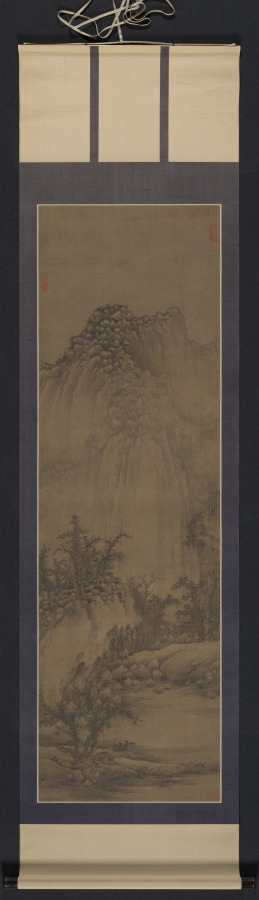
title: Buddhist Retreat by Stream and Mountains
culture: China, Northern Song dynasty (960-1127)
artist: Juran (Chinese, active 960–985)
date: 960–85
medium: Hanging scroll; ink on silk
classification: Painting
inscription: The upper portion of the scroll: the two small characters, “Ju wu 巨五”, written near the large seal. Written by a functionary in Shang Shu Sheng (the Department of State Affairs) when the painting was first received.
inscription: The upper portion of the scroll: the large seal, “Shang Shu Sheng yin 尚書省印” (seal of the Department of State Affairs)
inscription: The upper portion of the scroll: the half-seal “Si yin 司印”, seen along a border. Attributed to 典禮紀察司 of Ming dynasty.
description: Monk Juran served the Southern Tang (937–75) imperial house in Nanjing, where he studied with Dong Yuan (active 930s–60s). Both founded the southern landscape tradition, or Jiangnan school, known for gentle misty riverscapes in wet ink. Juran moved north to Kaifeng when the Southern Tang surrendered to the Northern Song, the impact of which may be seen in this painting, presumably painted after 976. A towering mountain dominates the composition, typically representing the style of the Northern Song academy; while the use of long hemp fiber strokes to texture the mountains, wet dots, and round boulders on mountain tops are elements of the southern landscape tradition.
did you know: This hanging scroll with the towering mountain is a prime example of the monumental landscape style of Northern Song.